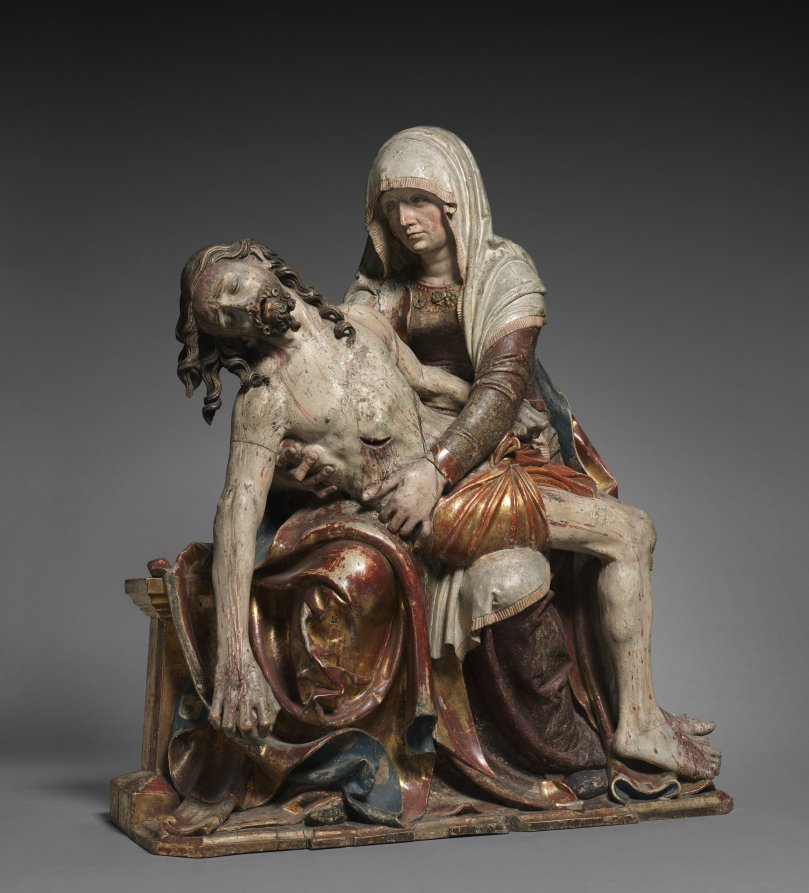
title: Vesperbild (Pietà)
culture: Germany, Upper Bavaria, 16th century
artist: Master of Rabenden (German)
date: c. 1515–20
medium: lindenwood, polychromed and gilded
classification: Sculpture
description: Depicting the Virgin cradling Christ’s dead body, works like this one were known in German as vesperbilds, owing to their incorporation into the liturgy of the evening prayer (vespers) on Good Friday. The word pietà—from the Latin pietas, meaning "piety" or "compassion"—was also used to describe such works. Like other devotional image types that emerged in southern Germany in the later medieval period, vesperbilds encouraged viewers to contemplate Christ’s suffering and empathize with the Virgin’s sorrows more directly and emotively than ever before. This anonymous German artist is named after one of his most important works, the high altar of the church of Rabenden in the Chiemgau, the foothills of the Alps. The sculpture was likely placed in a secondary chapel in a Bavarian church.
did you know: This sculpture sensitively depicts the Virgin cradling the body of Christ. This devotional image was likely placed near the altar in a German chapel. Imagine standing in a small, quiet chapel looking up at these lifelike figures with flickering candles casting dappled light onto their surface.